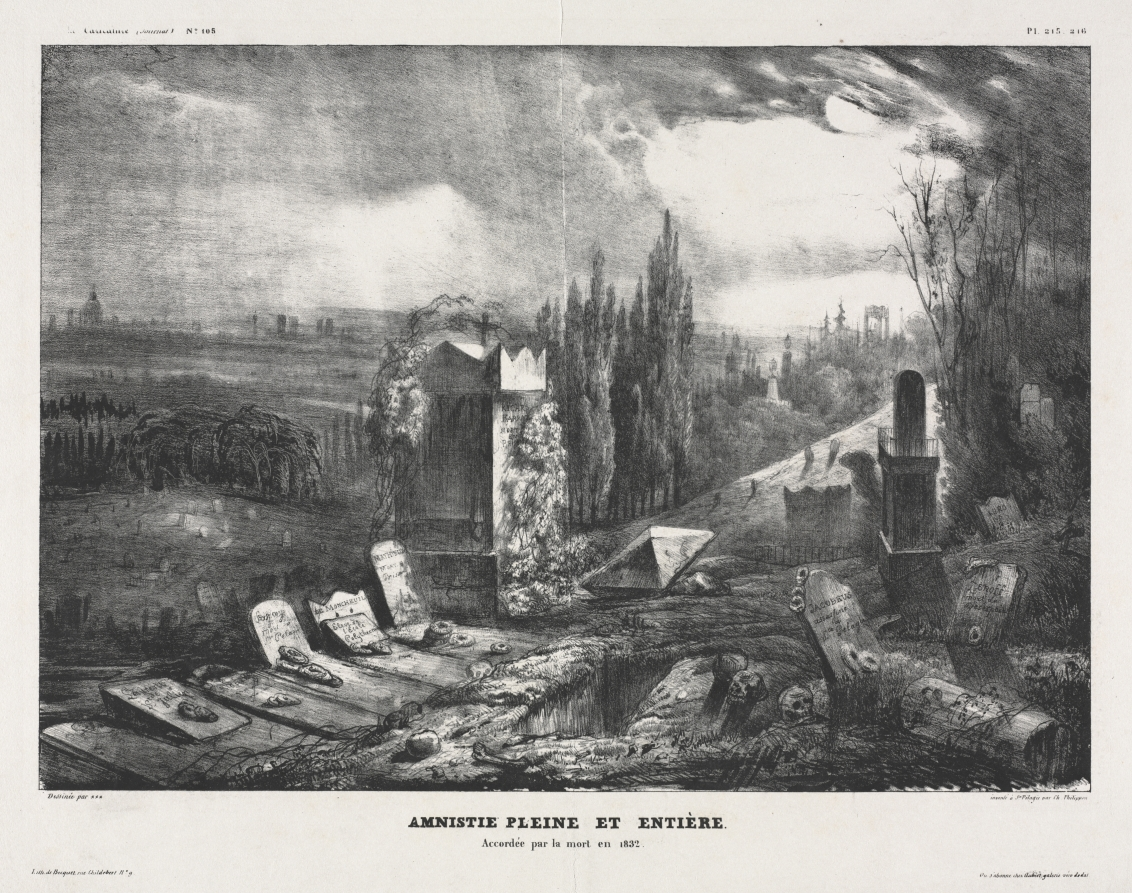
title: Full and Complete Amnesty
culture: France, 19th century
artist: Paul Hüet (French, 1803–1869)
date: c. 1832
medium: lithograph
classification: Print